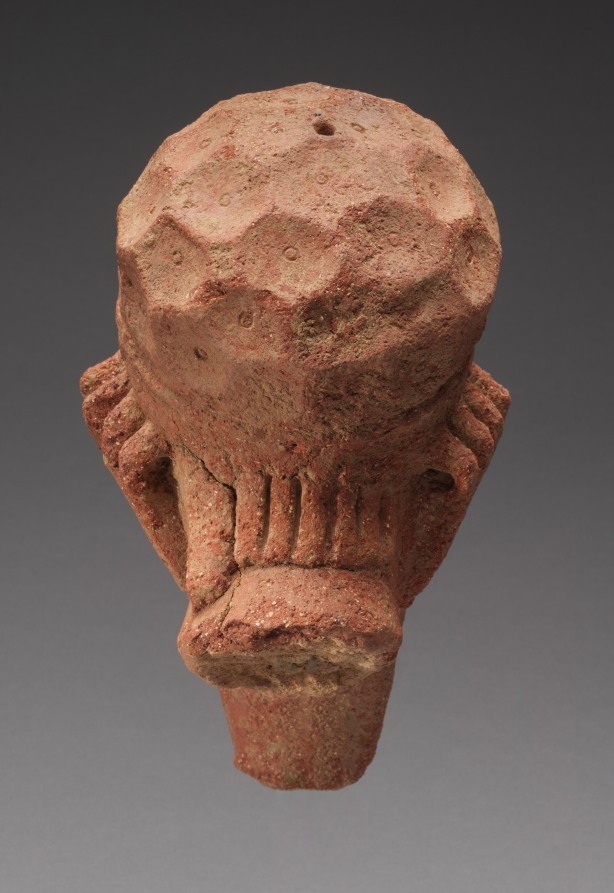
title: Head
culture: Africa, West Africa, Nigeria, Nok-culture style region, unknown female ceramicist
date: thermoluminescence date 20–620 CE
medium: terracotta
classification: Sculpture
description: More than 500 such sculptures—often full figures with elaborate hairstyles and jewelry— have been found in central Nigeria. Named after a discovery site, Nok culture (500 BCE–200 CE or 1500–1 BCE) produced the earliest large figurative artworks in Africa outside of Egypt. Little was known about their social context, as they were first found in mining deposits in the 1920s. Archaeological excavations conducted in the 2000s by a German-Nigerian team suggest that many sculptures were deliberately broken and placed under pavements and in pits, indicating ritual practice. Male-centered art histories presumed men made these figurative sculptures; however, they incorporate building and firing techniques practiced only by women.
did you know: This complete head’s bold modeling, deliberate asymmetry, and sensitive expression make it one of the finest known examples of Nok sculpture.